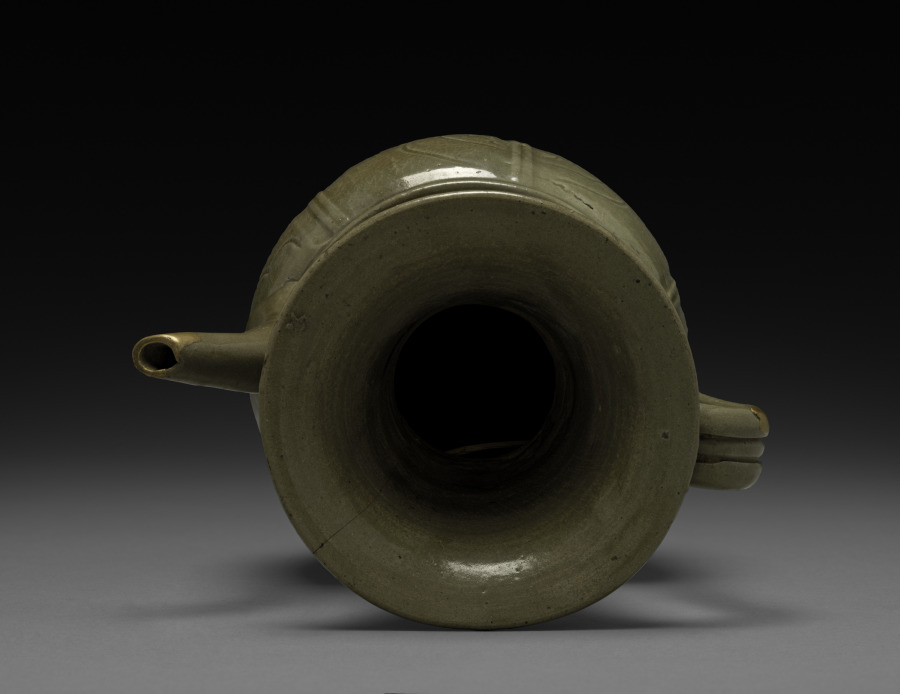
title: Wine Jug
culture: China, Zhejiang province, Shang-lin-hu type, Five dynasties (907–960) to Song dynasty (960–1279)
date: 900s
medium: glazed gray stoneware, Yue ware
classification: Ceramic